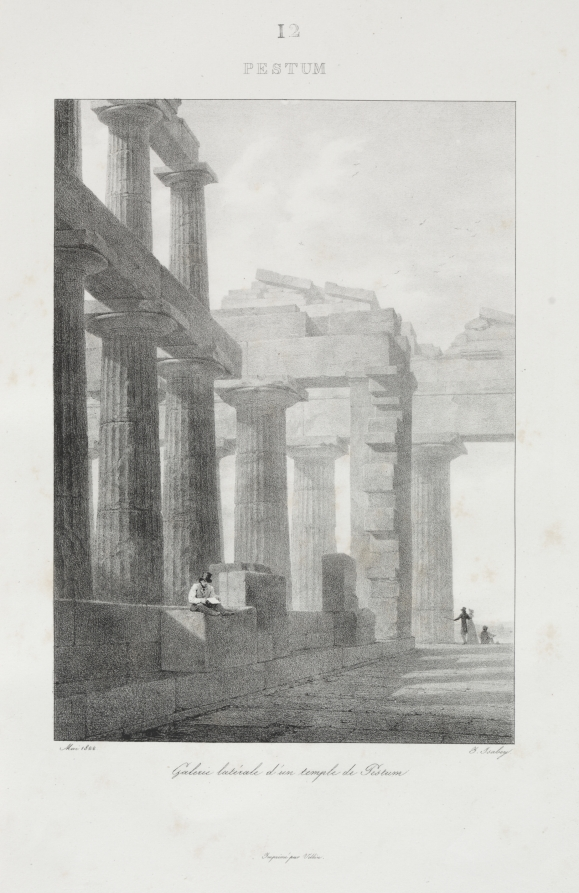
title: Voyage en Italie en 1822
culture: France, 19th century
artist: Jean-Baptiste Isabey (French, 1767–1855)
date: 1833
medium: lithograph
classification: Bound Volume